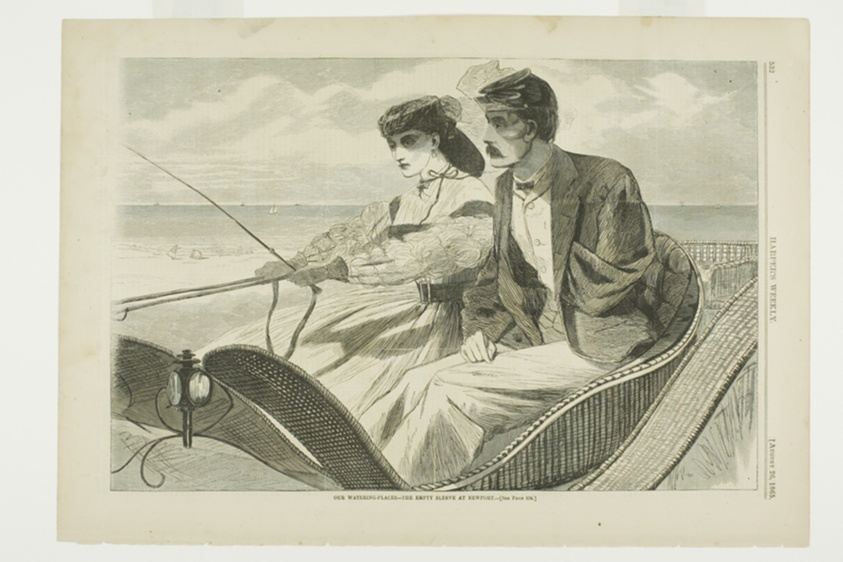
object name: Print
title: Our Watering Places—The Empty Sleeve at Newport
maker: Winslow Homer (American, 1836-1910); published by Harper's Weekly (American, 1857-1916)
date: published August 26, 1865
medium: Wood engraving on buff wove paper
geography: United States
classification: wood engraving; print; prints and drawing